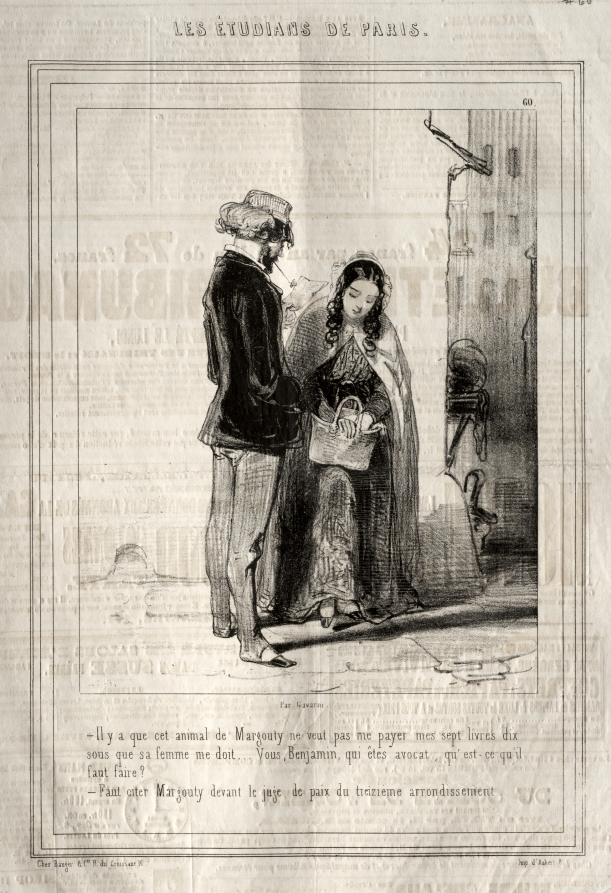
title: Les Étudiants de Paris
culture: France, 19th century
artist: Paul Gavarni (French, 1804–1866)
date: 1842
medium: lithograph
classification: Print